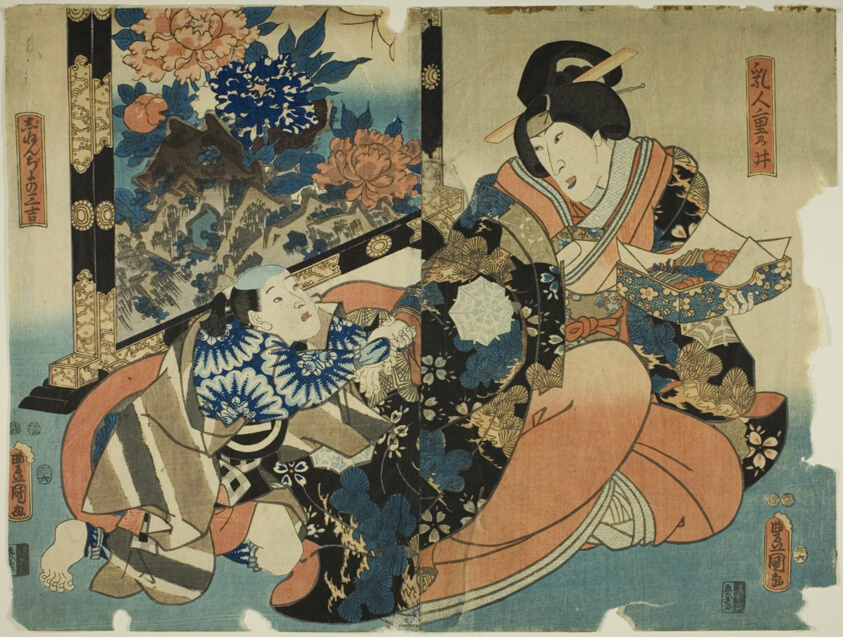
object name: Print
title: The actors Nakamura Tomijuro II as the wet nurse Shigenoi and Ichimura Uzaemon XIII as Jinenjo no Sankichi in the play "Koi Nyobo Somewake Tazuna," performed at the Ichimura Theater in the fifth month, 1854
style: Japanese (culture or style)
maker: Utagawa Kunisada I (Toyokuni III) (Japanese, 1786-1864)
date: 1854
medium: Color woodblock print; oban diptych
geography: Japan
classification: woodblock print; print; asian art